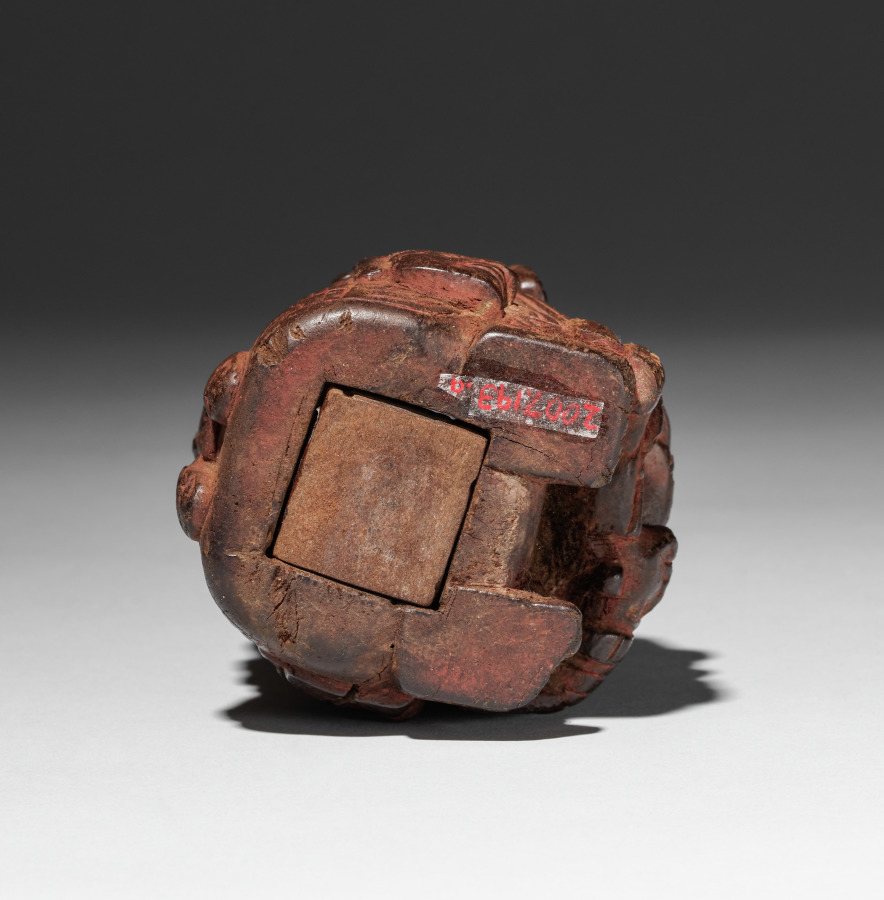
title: Sacrificer Container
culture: Central Andes, Wari style (600-1000)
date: 770–890 (radiocarbon date, 95% probability)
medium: wood and cinnabar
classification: Wood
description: This container assumes the shape of a magnificent, feline-headed, supernatural sacrificer who draws a knife across the throat of the human it holds in its lap. Severed human heads hang from the feline's belt and dangle by the trachea at the back of its headdress. Sacrifice had a place in Wari religious practice, probably as an unusual and exceptionally precious offering made to entice the benevolence of cosmic forces. Indeed, colonial-period Andean people believed that death was a prerequisite for the renewal of the world.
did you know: Traces of cinnabar, a toxic mercuric sulfide, are visible on the container's surface.